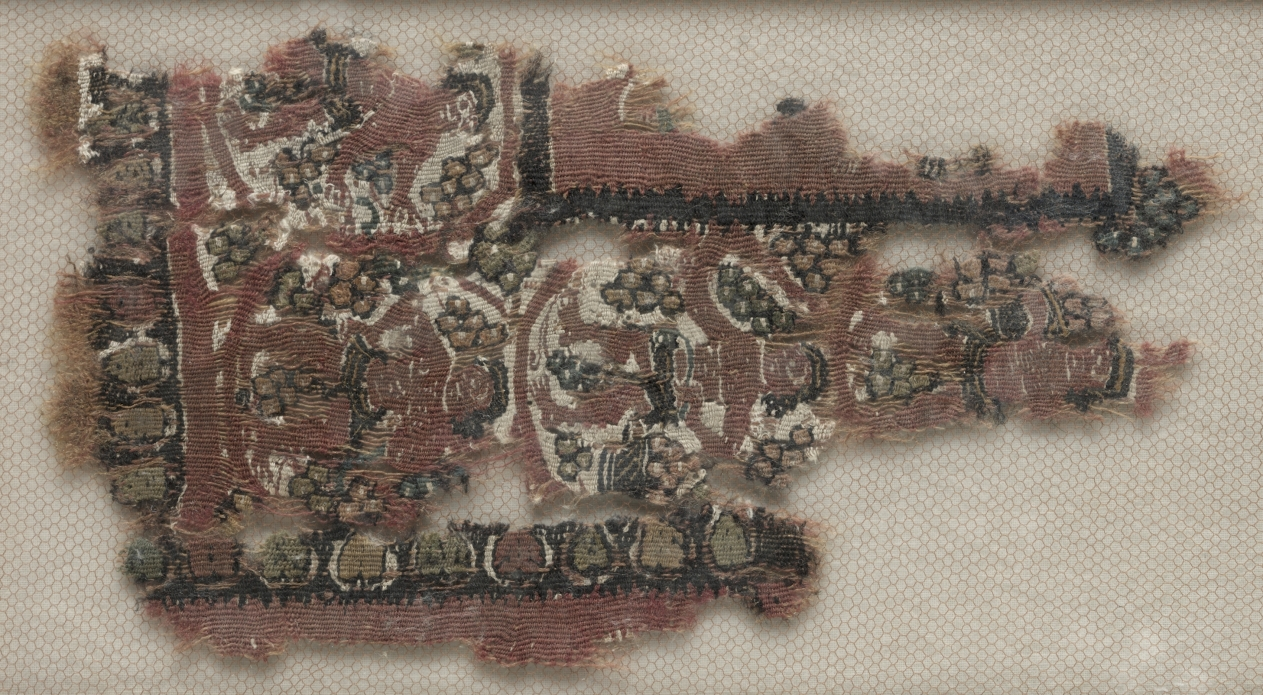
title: Fragment of the Corner of a Tunic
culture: Egypt, Byzantine period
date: 400s - 600s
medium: tapestry; linen and wool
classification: Textile